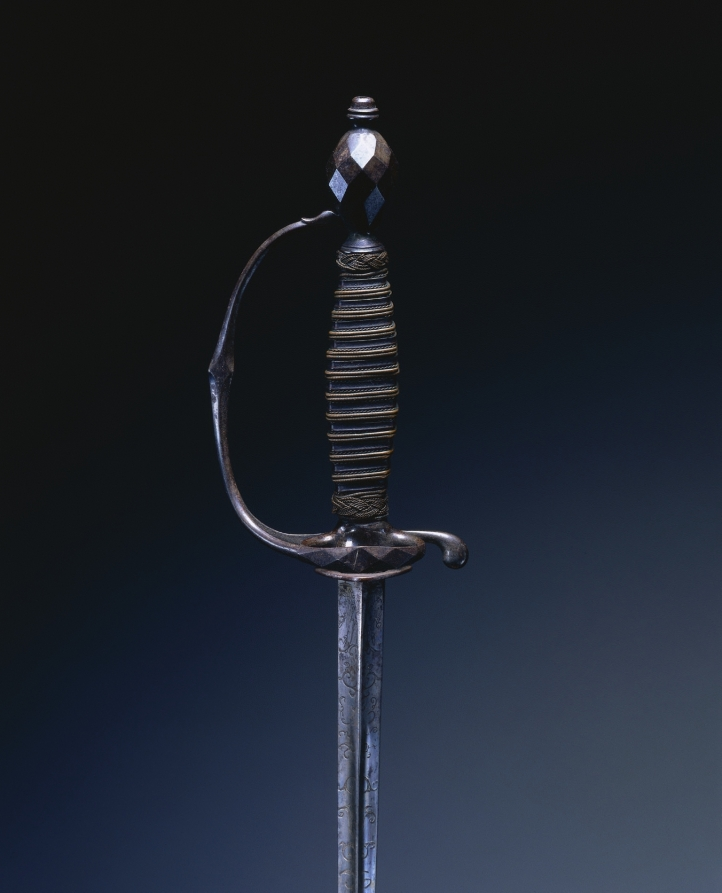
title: Small Sword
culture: Italy (?), early 18th Century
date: c. 1700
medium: steel, wood, copper wire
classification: Arms and Armor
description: During the 1700s, the small-sword emerged as a light, quick weapon. Like the rapier it was carried by unarmored civilians, the noblemen of the upper classes. Over time this delicate sword became more an accessory of male attire than a weapon essential to life and death. The sword hilt, which shows even when the blade is sheathed, became the ground for elaborate decoration. These small-swords thus represent the final stage in the evolution of the sword, from the edged weapons of antiquity to the elegantly refined blades of the 1700s and 1800s.